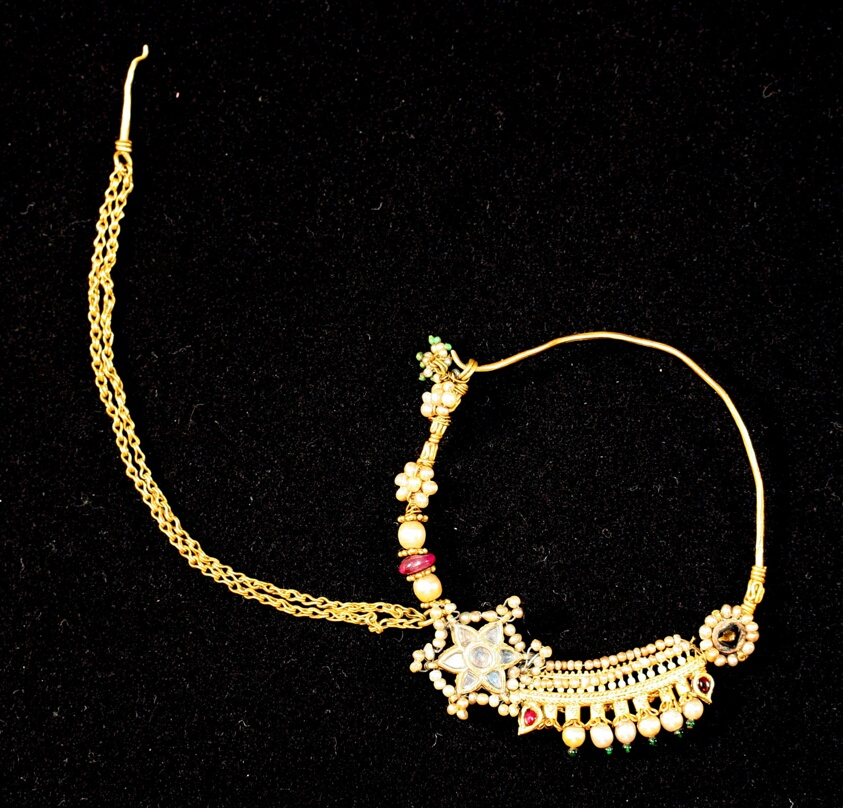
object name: Costume and Accessories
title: Nose Ring (Nath)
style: South Asian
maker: India; Rajasthan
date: 19th century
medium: Gold, pearls, diamonds, and rubies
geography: India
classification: jewelry; asian art; costume